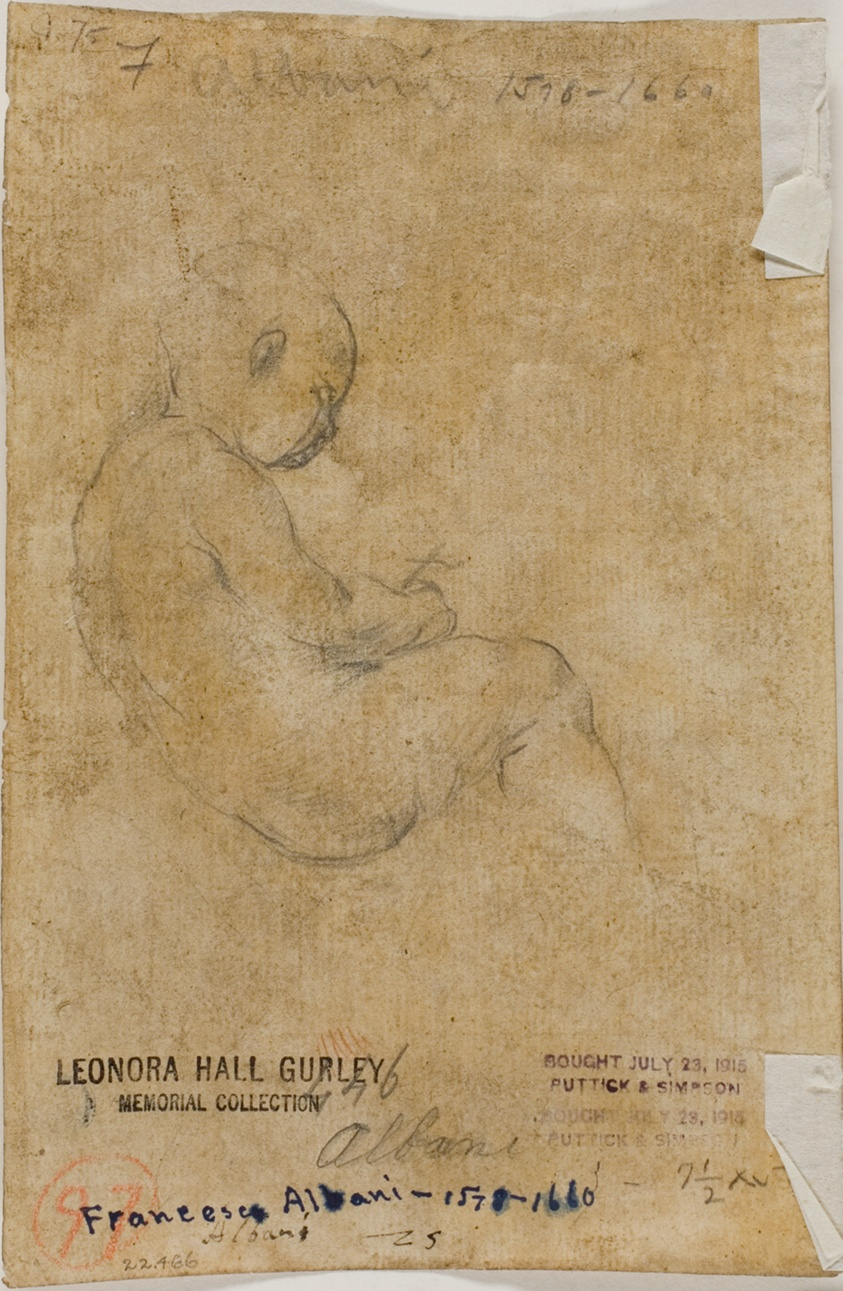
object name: Drawing and Watercolor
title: Putto Lifting Curtain (recto); Infant St. John (verso)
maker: Style of Mattia Preti (Italian, 1613-1699); or Circle of Carlo Maratti (Italian, 1625-1713); or Francesco Albani (Italian, 1578-1660)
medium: Red chalk (recto) and black chalk (verso) on tan laid paper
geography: Italy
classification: drawings (visual works); prints and drawing